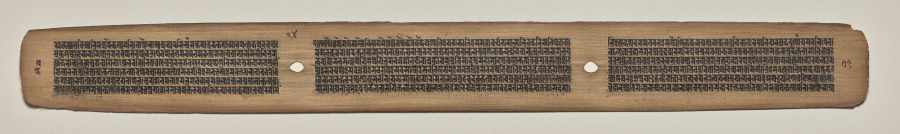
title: Text, Folio 24 (verso), from a Manuscript of the Perfection of Wisdom in Eight Thousand Lines (Ashtasahasrika Prajnaparamita-sutra)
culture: Eastern India, Bihar, Vikramashila Monastery. Painting: Nepal, Kathmandu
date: Sunday, September 14, 1119 (year 239 of the Newar Samvat in the month of Ashvina)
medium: gum tempera and ink on palm leaves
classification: Painting